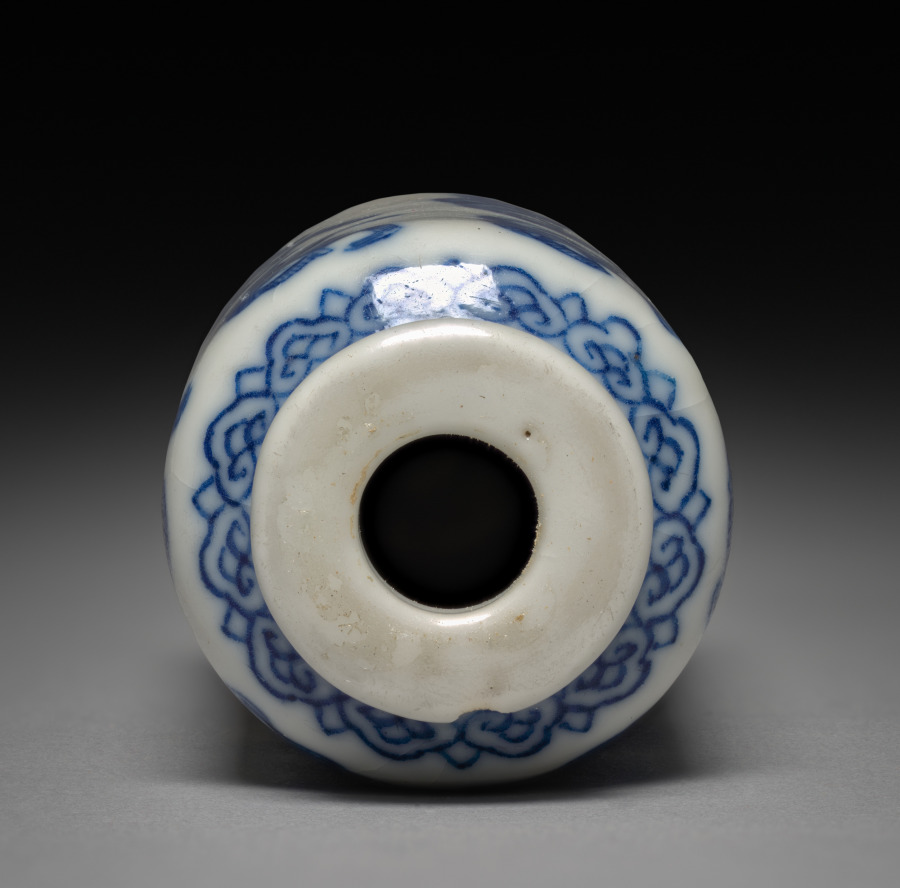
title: Snuff Bottle with Stopper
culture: China, Jiangxi province, Jingdezhen kilns, Qing dynasty (1644-1911), Yongzheng mark and reign (1723-35)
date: 1723–35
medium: porcelain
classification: Ceramic